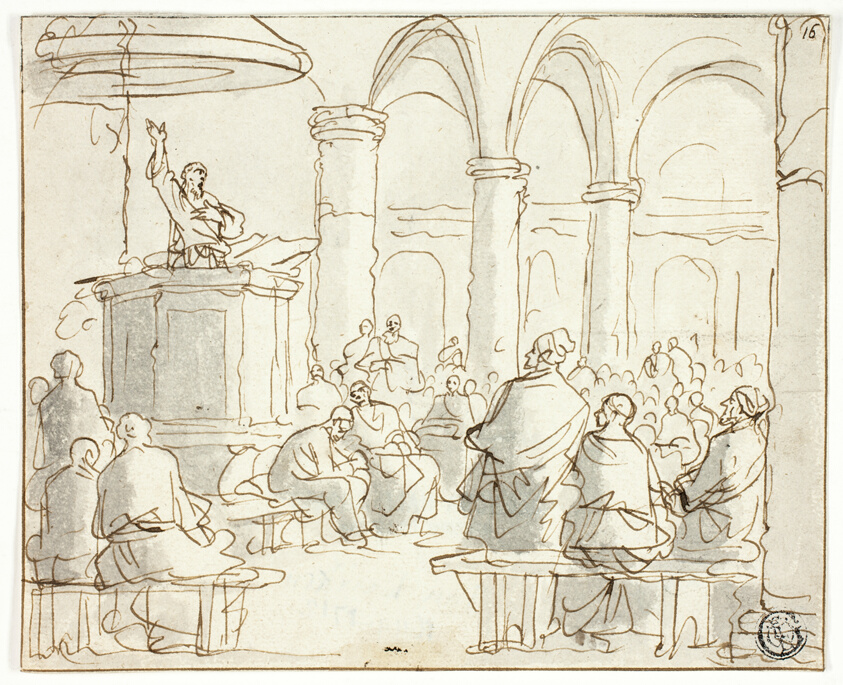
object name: Drawing and Watercolor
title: Man Preaching to Congregation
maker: Jan Luyken (Dutch, 1649-1712)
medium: Pen and brown ink, with brush and gray wash, on ivory laid paper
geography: Netherlands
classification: pen and ink drawings; drawings (visual works); prints and drawing